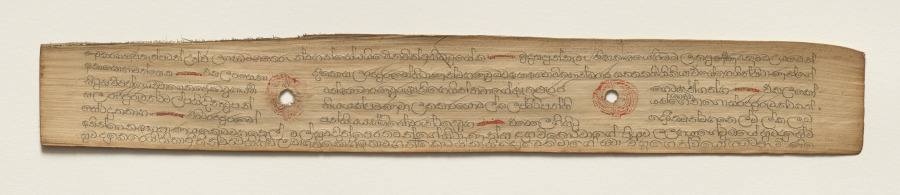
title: Leaf from a Buddhist Manuscript (verso)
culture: Sri Lanka, Singhalese, Late 17th century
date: c. 1700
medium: fiber paper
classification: Manuscript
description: Palm leaf material is still used for manuscripts in Sri Lanka. The palm leaves are prepared first by boiling them, drying them in the sun, and then rubbing them with oils. Scribes then use a metal stylus to incise the text. Then charcoal powder is wiped across the pages, filling in only the inscribed lines.